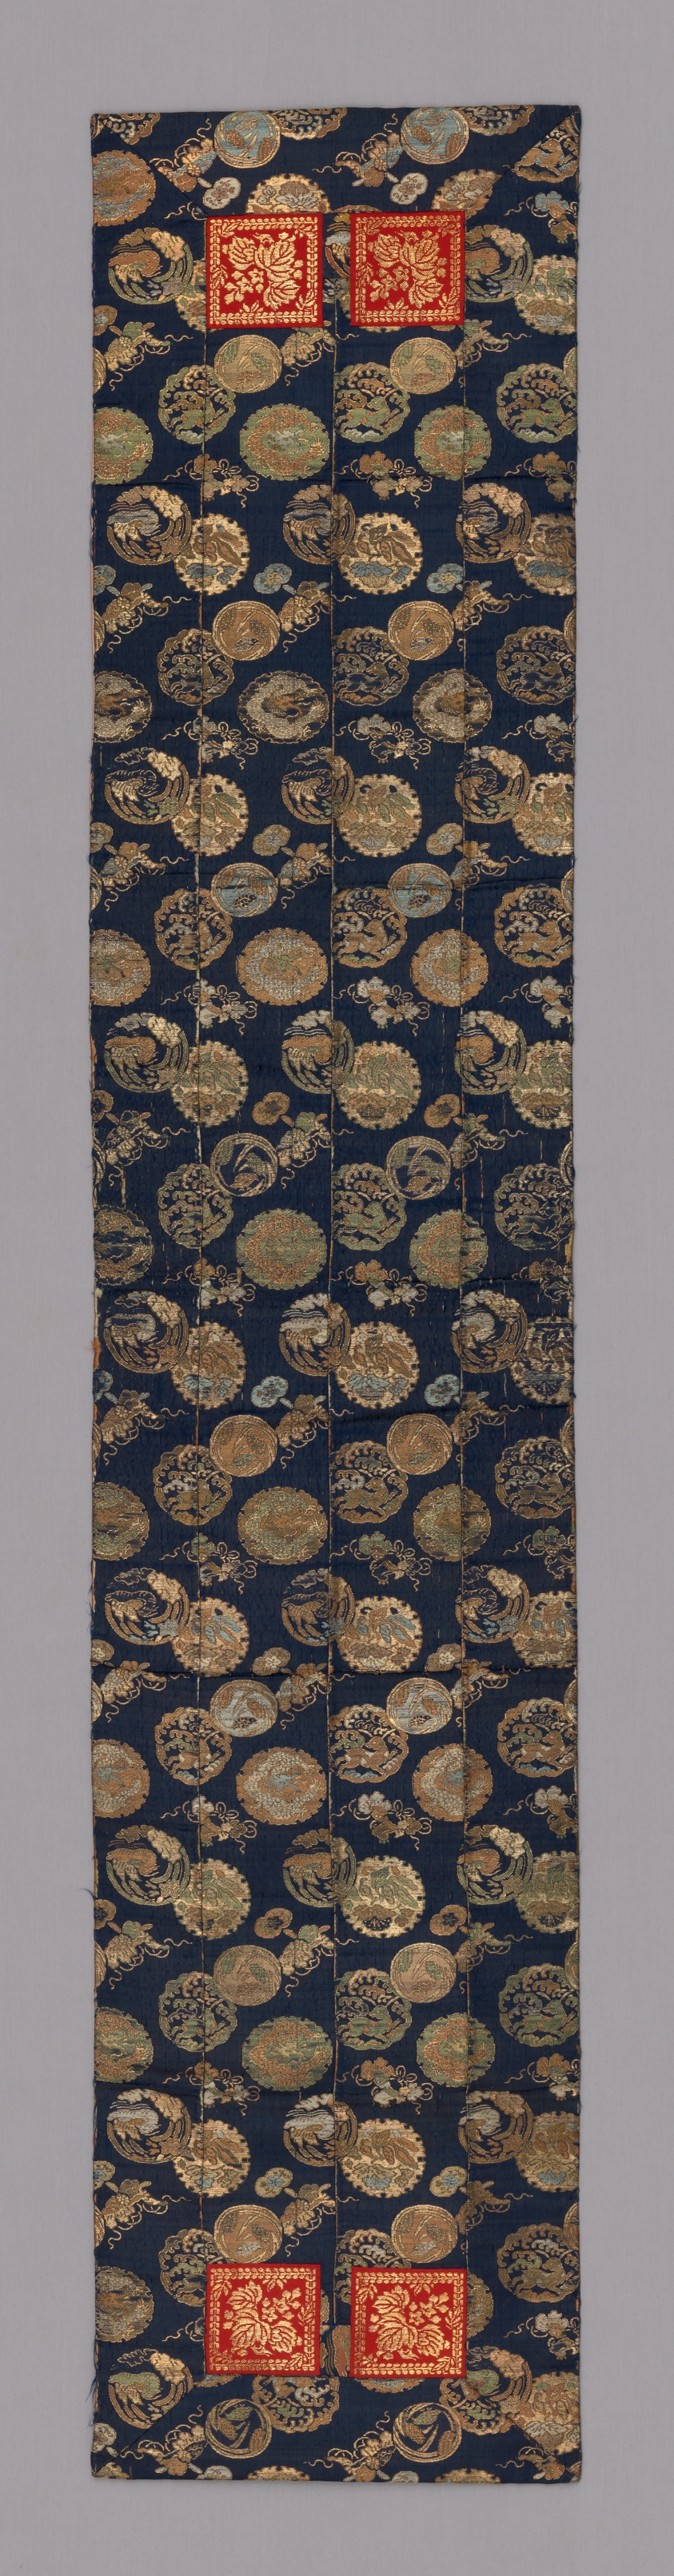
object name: Textile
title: Ôhi (Stole)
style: Japanism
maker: Japan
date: late Edo period (1789–1868), 1801/25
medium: make of pieces of nishiki-kinran, silk compound weave, with ground of dark blue flecked pattern and circular motifs woven in colored silks and kinran, cut paper with gold foil.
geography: Japan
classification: textile; liturgical - buddhist; costume; weaving